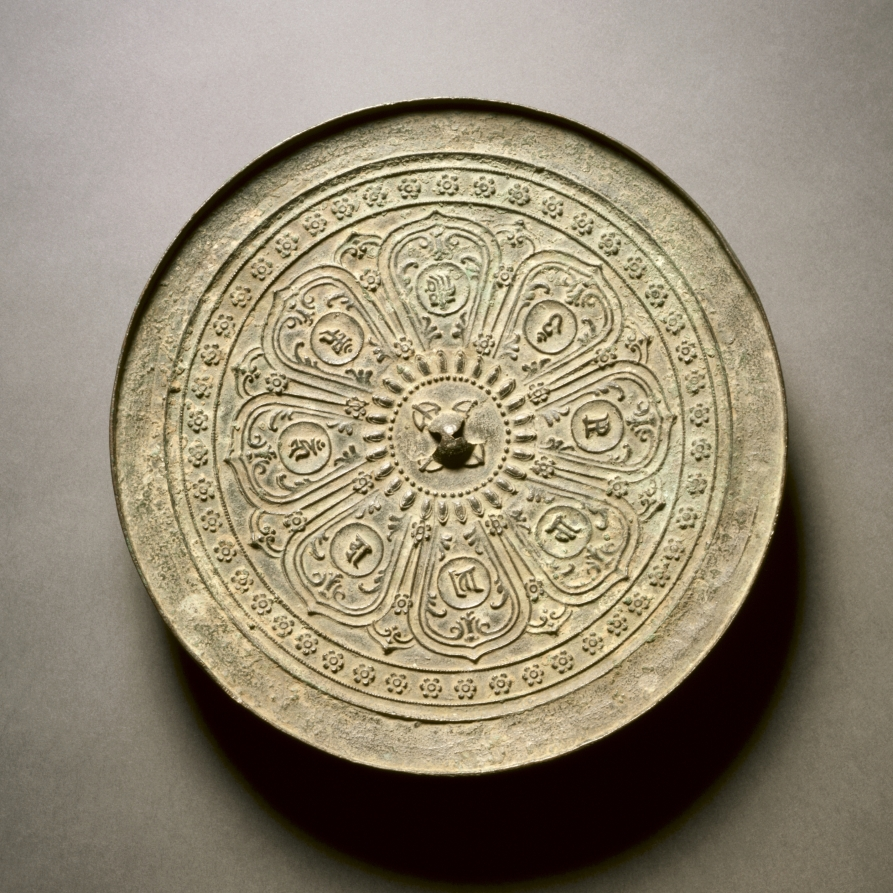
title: Mirror with Lotus and Mantra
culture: China, Yuan dynasty (1271-1368)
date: 1271–1368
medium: bronze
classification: Metalwork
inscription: "In the name of Om mani padme hum."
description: This mirror features intricate Buddhist designs. Around the central knob are four leaves, a ring of tiny beads, and then a circle made up of small lotus flower designs. Outside of that are eight big petal shapes, inside each is a Sanskrit letter. The mirror has the phrase "In the name of Om mani padme hum" written in a slightly incorrect form of Sanskrit, possibly because the Chinese mirror maker was not familiar with the language.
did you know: A mantra, or meditative statement, is embedded in the petals of the lotus flower on the mirror's back.